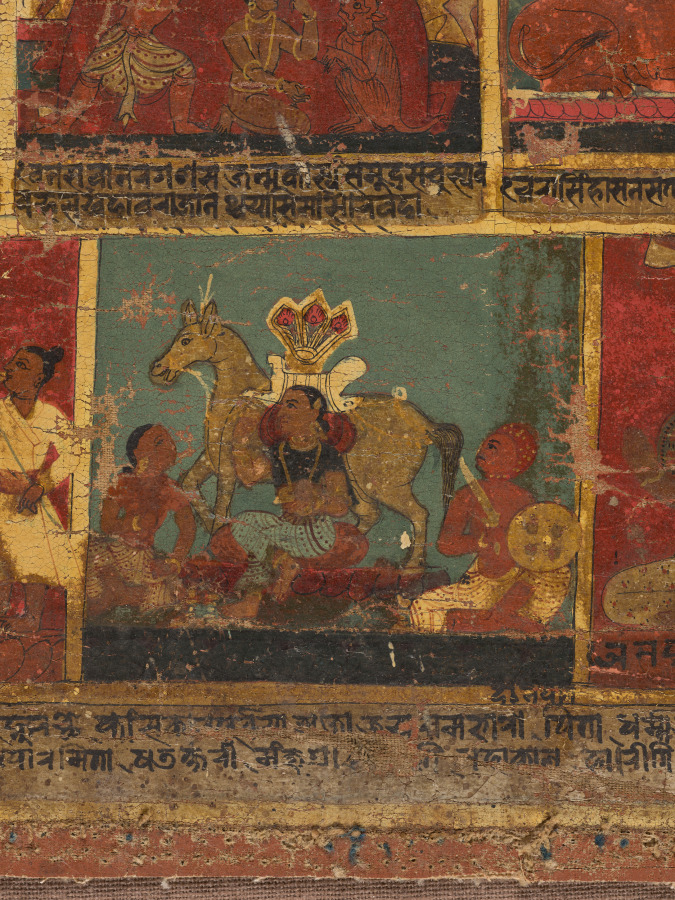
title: Bejeweled Buddha Preaching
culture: Nepal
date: 1648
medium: Gum tempera, ink, and gold on cloth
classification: Painting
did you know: Nepalese devotional paintings on cloth are called "paubha" in the Newari language.